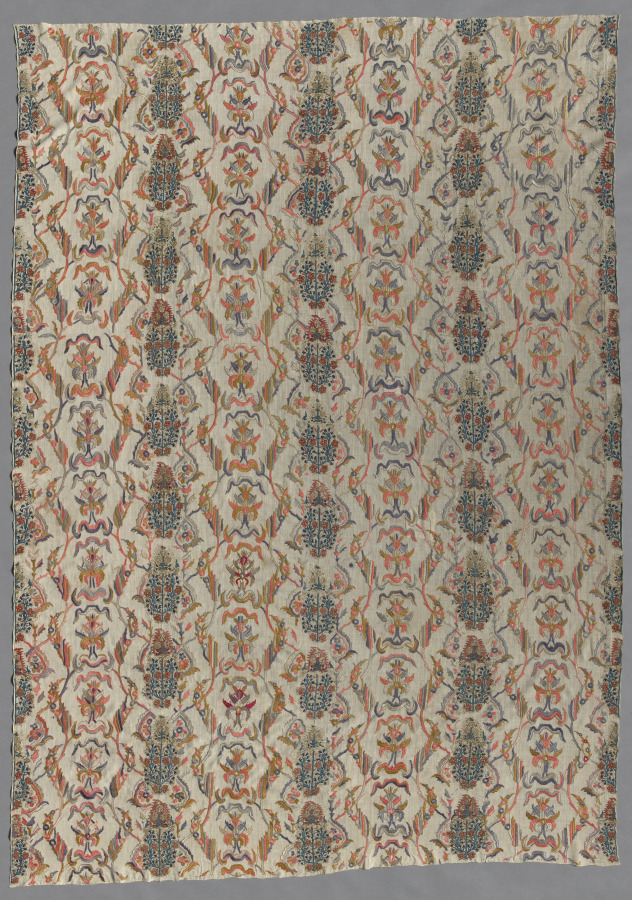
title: Bedspread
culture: Greece, Epirus, Yaninna, 19th century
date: 1800s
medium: embroidery: silk on linen tabby ground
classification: Embroidery